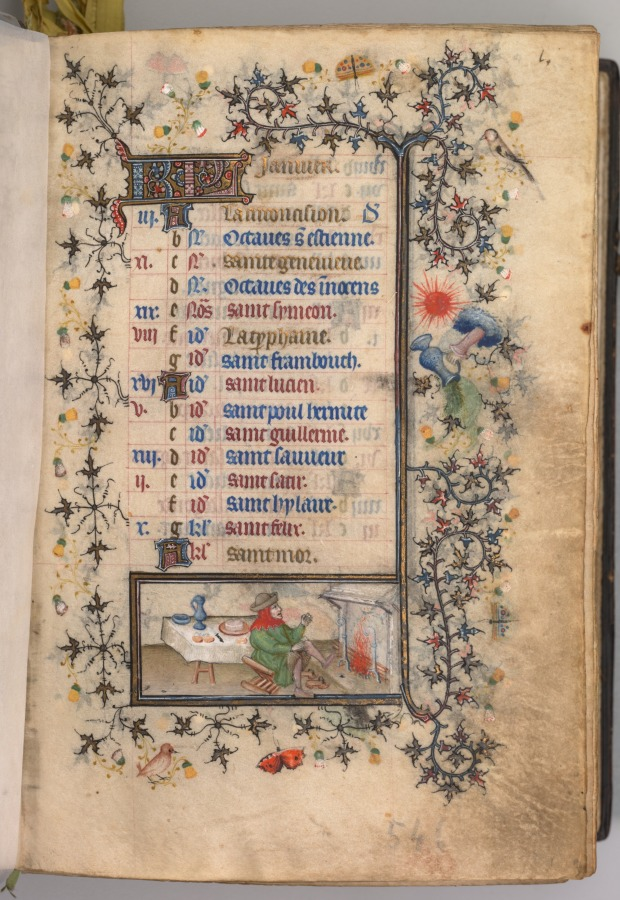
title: Hours of Charles the Noble, King of Navarre (1361-1425): fol. 1r, January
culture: France, Paris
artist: Master of the Brussels Initials and Associates (French)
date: c. 1405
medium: ink, tempera, and gold on vellum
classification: Bound Volume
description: This precious book was highly prized by its owner, Charles III, King of Navarre, a French-born prince whose coat of arms is painted on 20 folios. Charles visited Paris on numerous occasions and likely acquired this volume there in 1404. Paris was the center of the European book trade at the time and attracted illuminators from many parts of Europe. This manuscript represents one of the most remarkable fusions of French and Italian taste in book illumination. Though conforming to Parisian standards, most of the book’s major miniatures are the work of the Brussels Initials Master, an Italian illuminator who previously worked in Bologna and Padua.